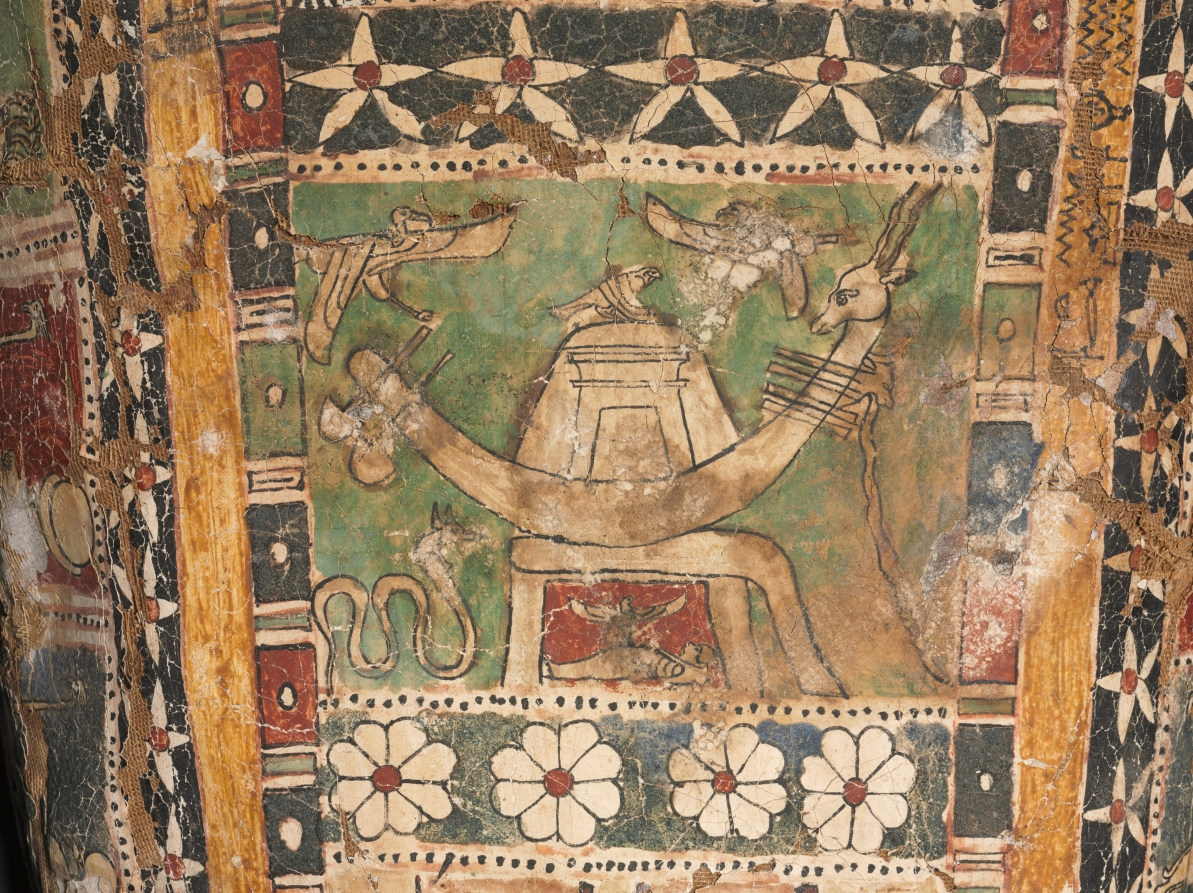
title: Cartonnage Mummy Case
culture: Egypt, Greco-Roman period (332 BCE–395 CE), Ptolemaic dynasty (305–30 BCE)–Roman empire (30 BCE–395 CE)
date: c. 50 BCE–50 CE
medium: cartonnage, painted and gilded, with glass inlays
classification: Funerary Equipment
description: This mummy case is made of cartonnage, a material similar to papier-mâché, but using layers of linen rather than paper. Cartonnage mummy cases such as these are contemporary with funerary portraits painted on wood or linen, although they present a very different appearance. The face, modeled in plaster, is bland and idealized, although the effect of the gilding and glass inlays is quite dazzling. The body is painted with traditional, age-old funerary motifs: the god Osiris, seated and mummiform; the fetish of Abydos, holy city of Osiris, flanked by standing deities (Thoth and Shu); a Horus falcon with outspread wings, and the bark of Sokar. Below these are the sandaled feet of the deceased. On the sides are rows of seated deities. On the top of the head are a winged scarab beetle flanked by Anubis jackals. On the foot are painted the soles of the deceased’s sandals, flanked by scorpions for protection.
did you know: This coffin is smaller and later in date than the other coffins in this gallery. It is made of cartonnage, which used layers of linen to create a material similar to papier-mâché. The painted portrait head displays the influence of Roman portraiture at this time and incorporates both gilding and glass inlays. Despite the fragile materials, this mummy case survived due to the very dry desert climate in which it was found.